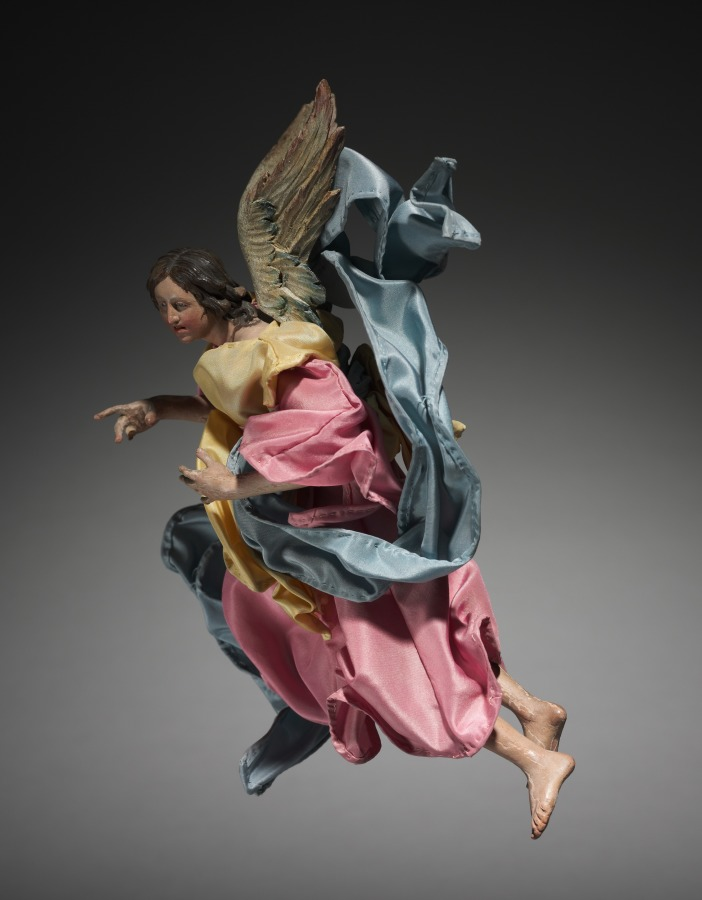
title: Figure from a Crèche: Angel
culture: Italy, Naples, late 18th-early 19th century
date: 1780–1830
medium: painted wood and terracotta with various textiles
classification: Sculpture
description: The practice of creating scenes of the Nativity for the home dates from the early 1700s in Italy, where people began to set up doll-like figures of about a foot or less in height. The custom was particularly popular in Naples around 1800, where crèche scenes (crèche means cradle, or crib) included many figures, whose heads and hands of painted terracotta, stuffed cloth bodies, and clothing adapted from contemporary local costumes gave them an amazingly realistic character. Representations of the birth of Jesus can be traced to the first few centuries of Christianity. Both living creatures and sculptural depictions of them were used from early times. By the late middle ages it was customary to create life-size figures of wood or stone, naturalistically painted, to represent the characters who participated in the events of Jesus's early life. These sculptures were then arranged in scenes illustrating one or both of the most important of these events, the Adoration of the Shepherds and the Adoration of the Magi-the three kings from the East who came to pay homage to the Christ child. Used in churches, these large figures were especially popular in Italy, Central Europe, Spain, and Portugal. This Object in Focus presentation was organized by Henry Hawley, Curator of Renaissance and Later Decorative Arts and Sculpture.